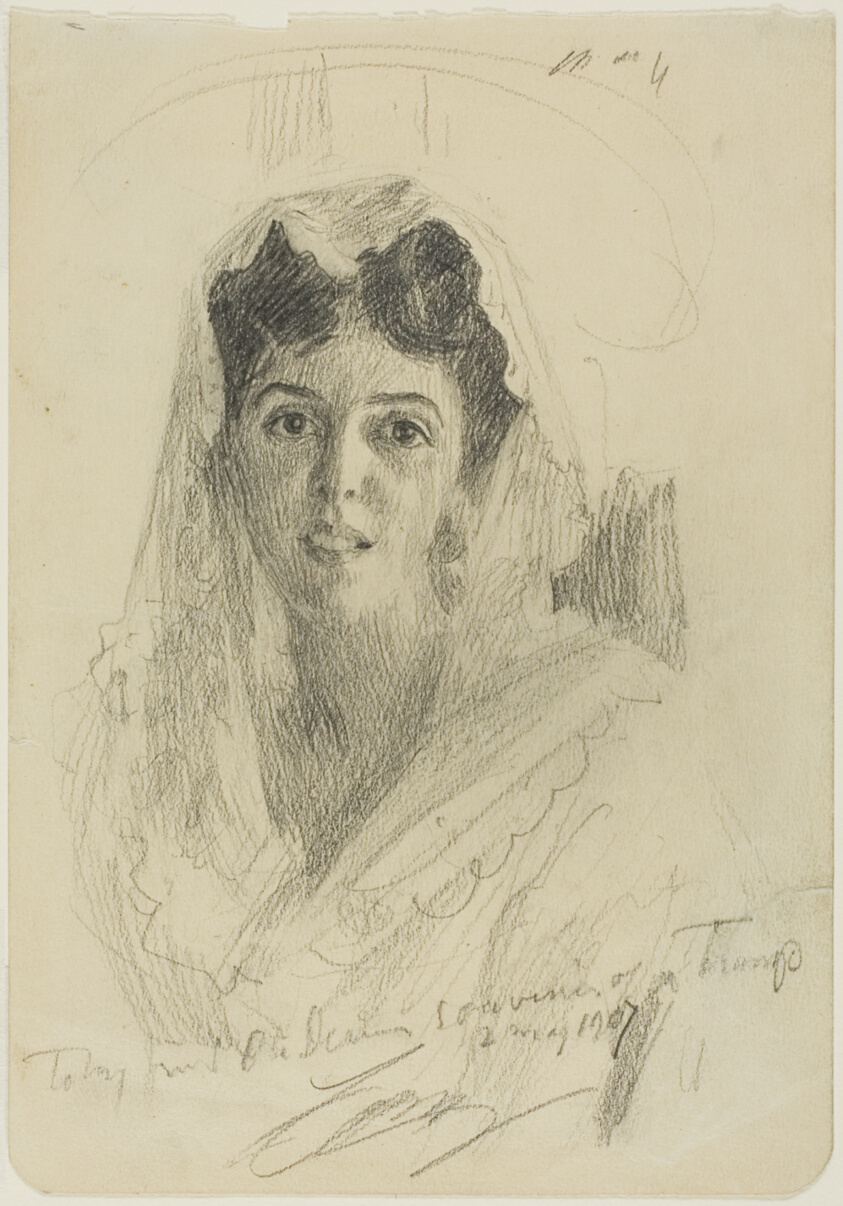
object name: Drawing and Watercolor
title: Head of a Woman (en Face)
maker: Anders Zorn (Swedish, 1860-1920)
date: 1907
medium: Graphite on cream wove paper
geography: Sweden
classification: graphite; drawings (visual works); prints and drawing